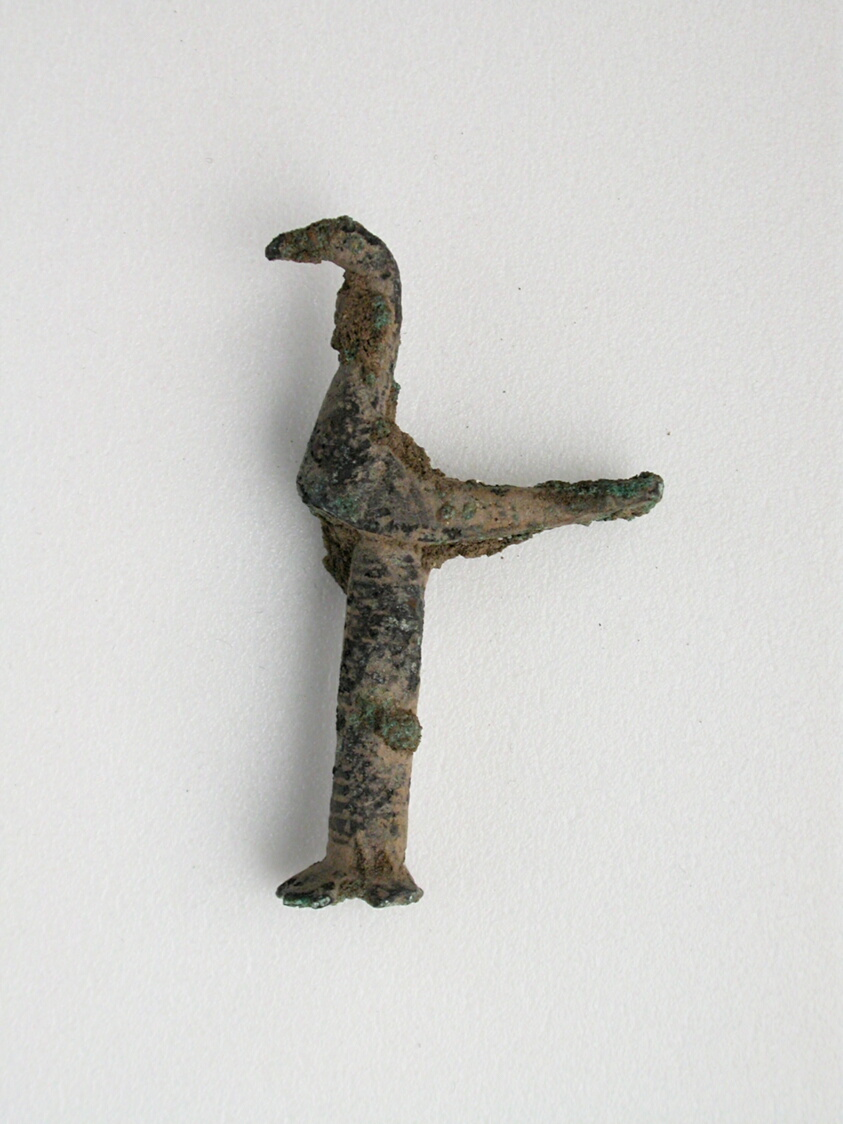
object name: Decorative Arts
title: Bird on Pole on Stand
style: geometric, ancient, greek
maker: Greek; Thessaly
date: Geometric Period (800–600 BCE)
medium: Bronze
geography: Greece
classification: votive offering; ex-voto; decorative arts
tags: bird